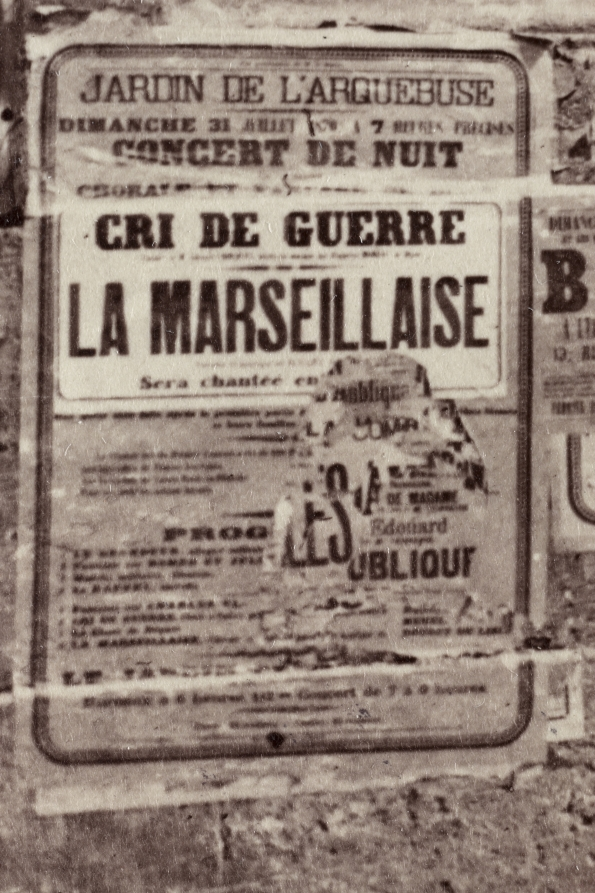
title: Street in Dijon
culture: France, 19th century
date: before 1870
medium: albumen print from wet collodion negative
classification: Photograph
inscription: Written in pencil on verso: "Dijon"